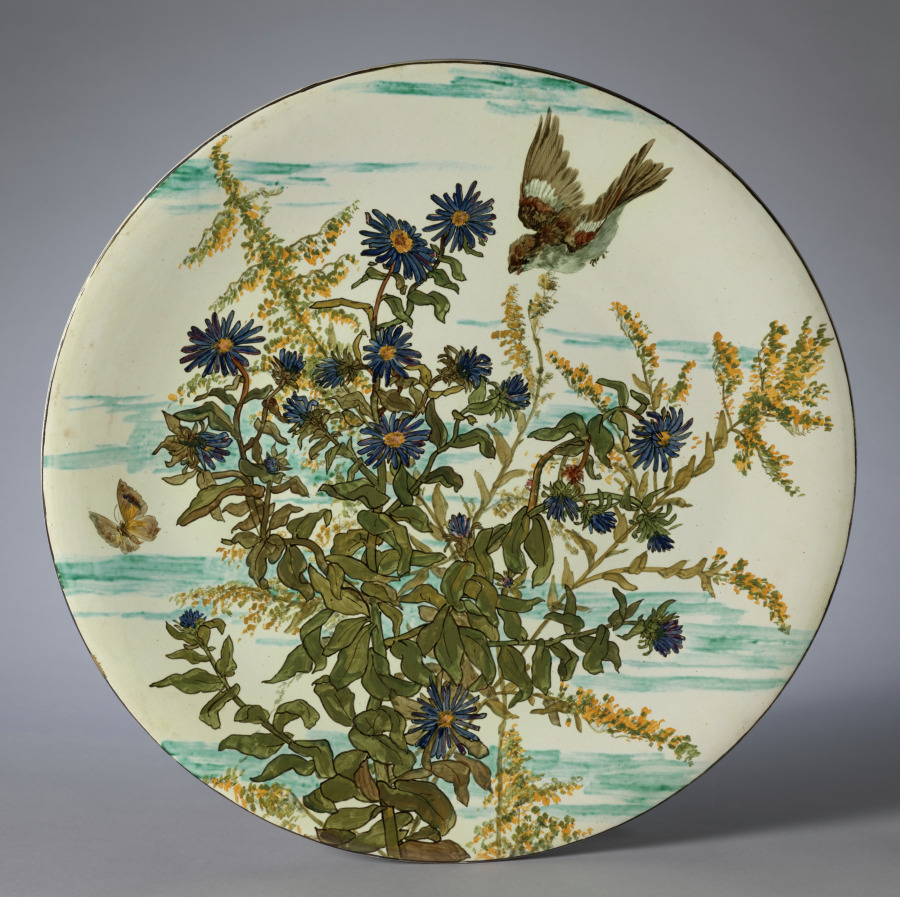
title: Plaque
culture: America, New York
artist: John Bennett (American, 1840–1907)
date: 1879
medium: earthenware with underglaze painted decoration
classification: Ceramic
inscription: inscription in black on bottom: "JB [in monogram] ENNETT/ 412 E 24/ N.Y./ 1879."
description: John Bennett was trained in England. He seems to have played a crucial role there by introducing painted decoration on ceramics at the Doulton factory in the early 1870s. Although they admired his talent, his English colleagues found Bennett had a difficult personality, and his stay at the Doulton factory was brief. By 1876 he was in New York, bringing with him the concepts of the English Aesthetic Movement: muted colors and great naturalism in the depiction of birds and flowers.